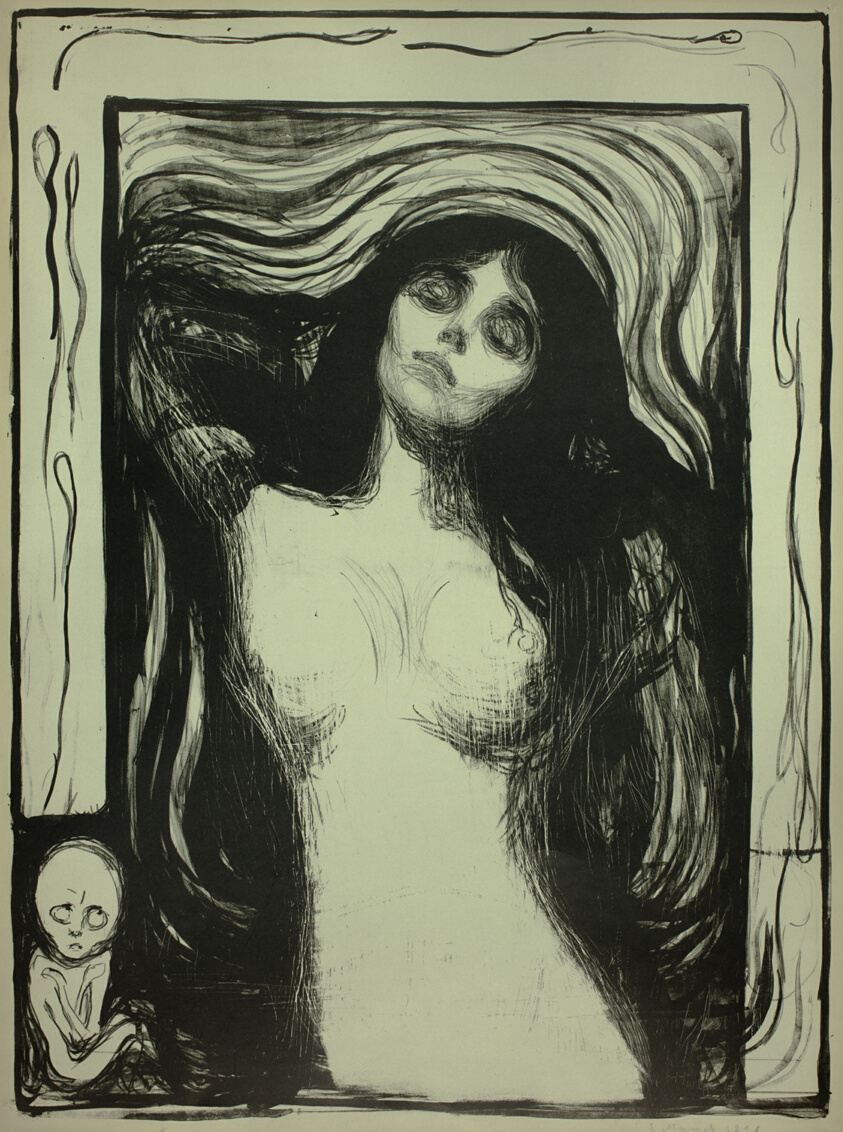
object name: Print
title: Madonna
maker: Edvard Munch (Norwegian, 1863-1944)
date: 1895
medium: Lithograph in black on green wove paper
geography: Norway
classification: print; lithograph; prints and drawing